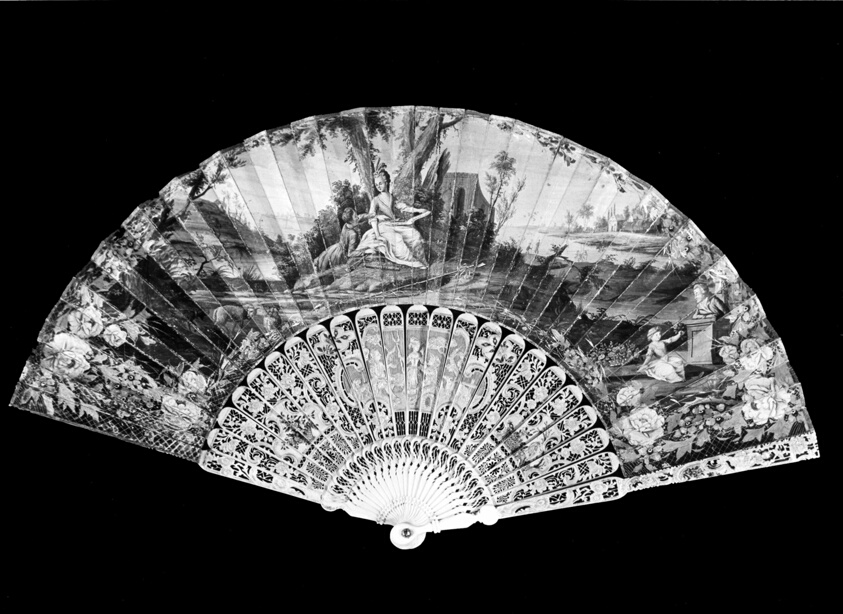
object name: Costume and Accessories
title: Fan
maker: England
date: 18th century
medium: Ivory guards and sticks, carved and painted; gold leaf; paper mount, painted; gold leaf; metal pin with semi-precious stones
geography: England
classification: textile; fan - paper; costume accessory - folding fan; costume